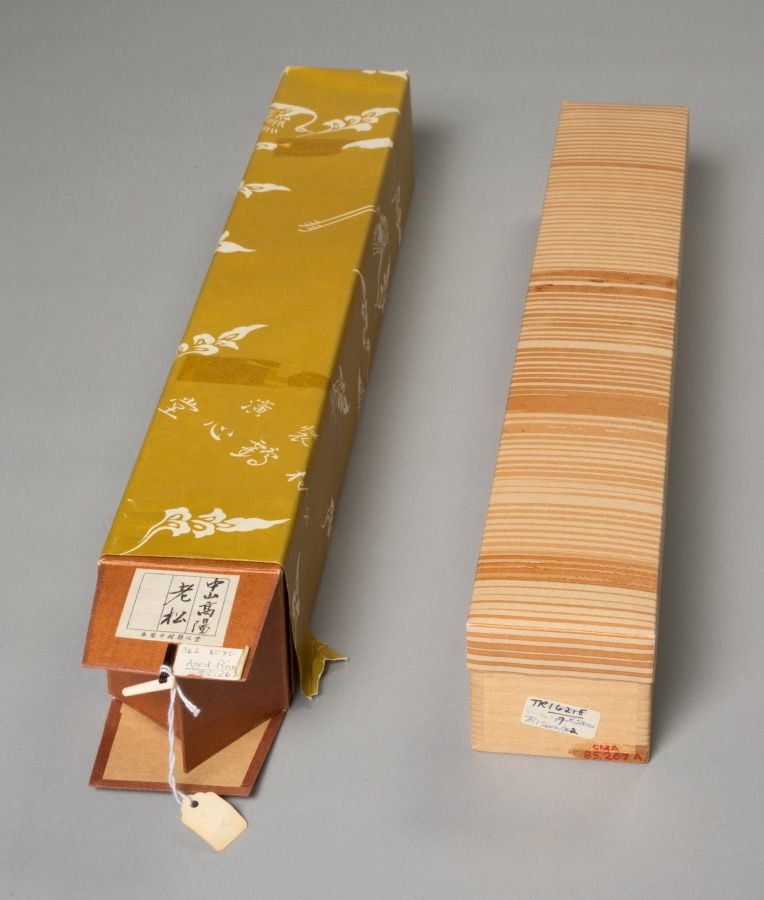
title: Aged Pine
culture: Japan, Edo period (1615–1868)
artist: Nakayama Kōyō (Japanese, 1717–1780)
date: 1717–80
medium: hanging scroll; ink on paper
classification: Painting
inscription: Artist's inscription and seal, lower right.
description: The ancient pine is an admired subject in Asian painting and symbolizes the desirable human qualities of wisdom and solid moral character.